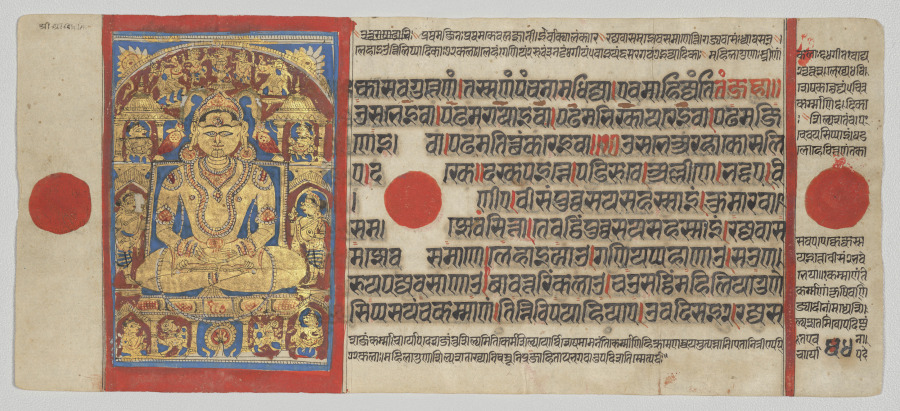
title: Nemi Enthroned, Folio 54 (verso), from a Kalpa-sutra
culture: Western India, Gujarat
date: c. 1475–1500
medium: Gum tempera, ink, and gold on paper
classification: Painting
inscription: [[upper left]] Śrī Āriṣṭanemi (?)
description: Followers of the Jain religion recognize 24 Jinas, individuals who reached liberation from the cycles of death and rebirth. Arishtanemi was the 22nd of the 24 and was a cousin of Krishna. Here Arishtanemi sits in eternal meditative bliss, crowned and bejeweled in a shrine. His attendants are sometimes recognized as the Hindu deities Krishna and Balarama. Followers of the Jain religion do not view Krishna as a supreme deity; instead, they view him and his brother Balarama as semidivine heroes with access to the liberated being.